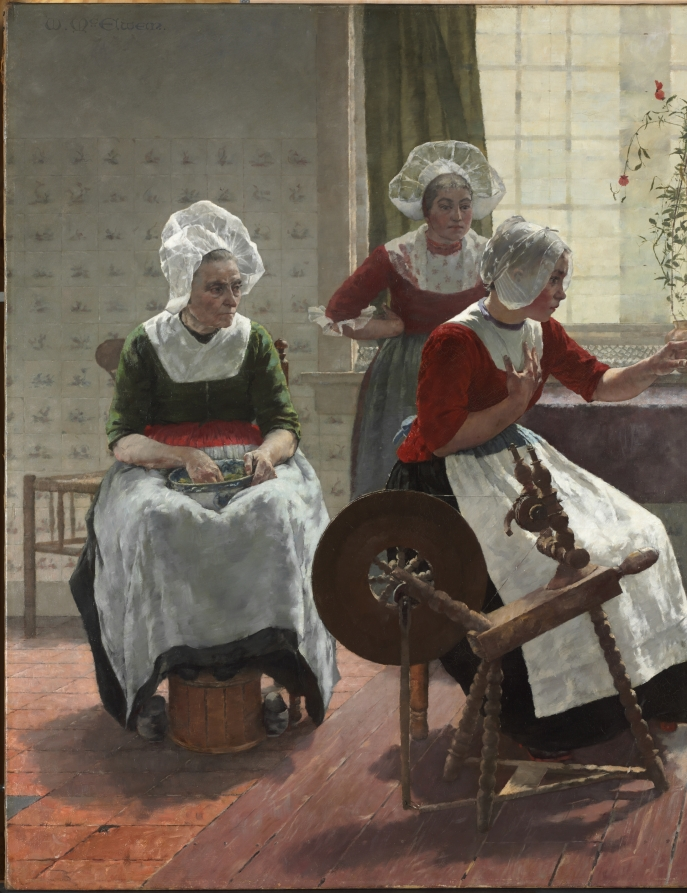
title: The Ghost Story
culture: America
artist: Walter MacEwen (American, 1860–1943)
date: 1887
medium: oil on canvas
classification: Painting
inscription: signed upper left: W. McEWEN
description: During the 1880s, the Netherlands became a magnet for several American artists, among them Walter MacEwen. His most famed painting, The Ghost Story, presents a group of individuals in a Dutch interior listening with rapt attention to spooky narration delivered by a woman at a spinning wheel. A young girl clutches her doll in fascination.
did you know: The women in this painting wear the traditional clothing of Volendam, a fishing village located in the province of North Holland.